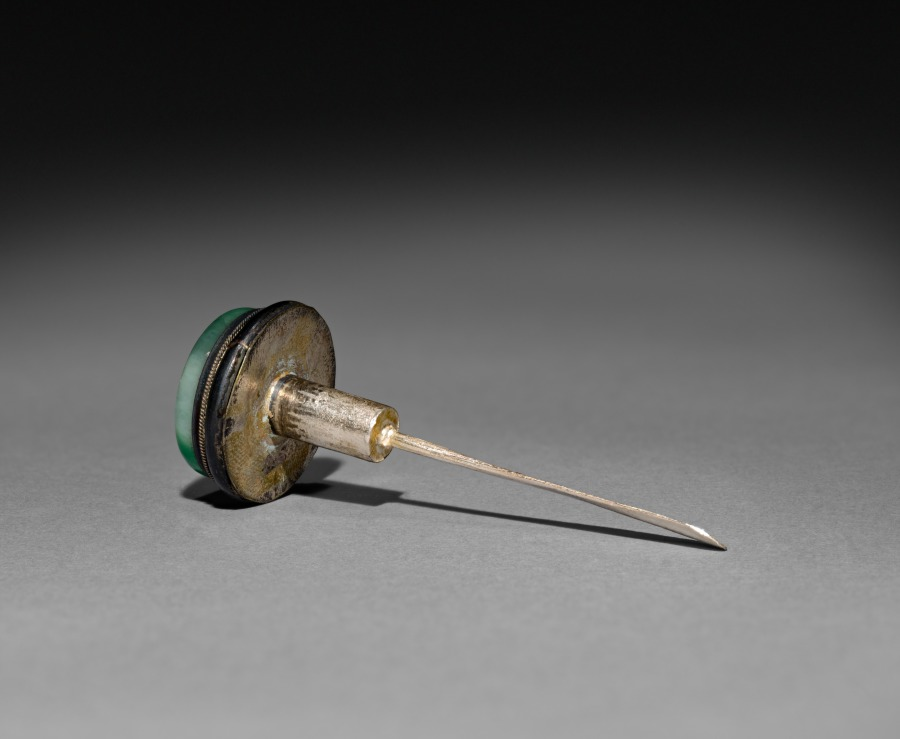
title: Snuff Bottle (stopper)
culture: China, Qing dynasty (1644-1911)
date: 1644–1911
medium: glass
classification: Glass